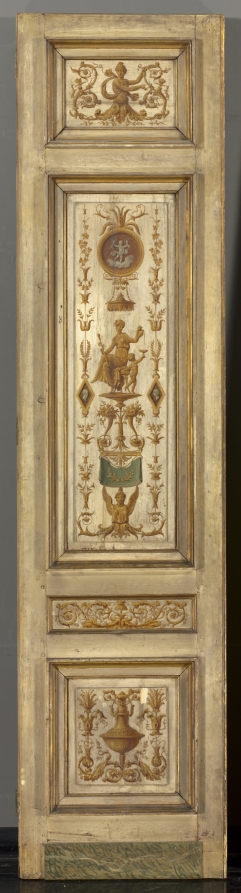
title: Double-leaf Doors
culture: France, 18th century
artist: Pierre Rousseau (French, 1751–1829)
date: 1790s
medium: oil on wood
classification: Painting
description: Shifts in style and taste often result in changes to original architectural details. Rousseau painted these doors with imitation dark wood grain. Another craftsman later scraped off the dark color surrounding the classical designs.